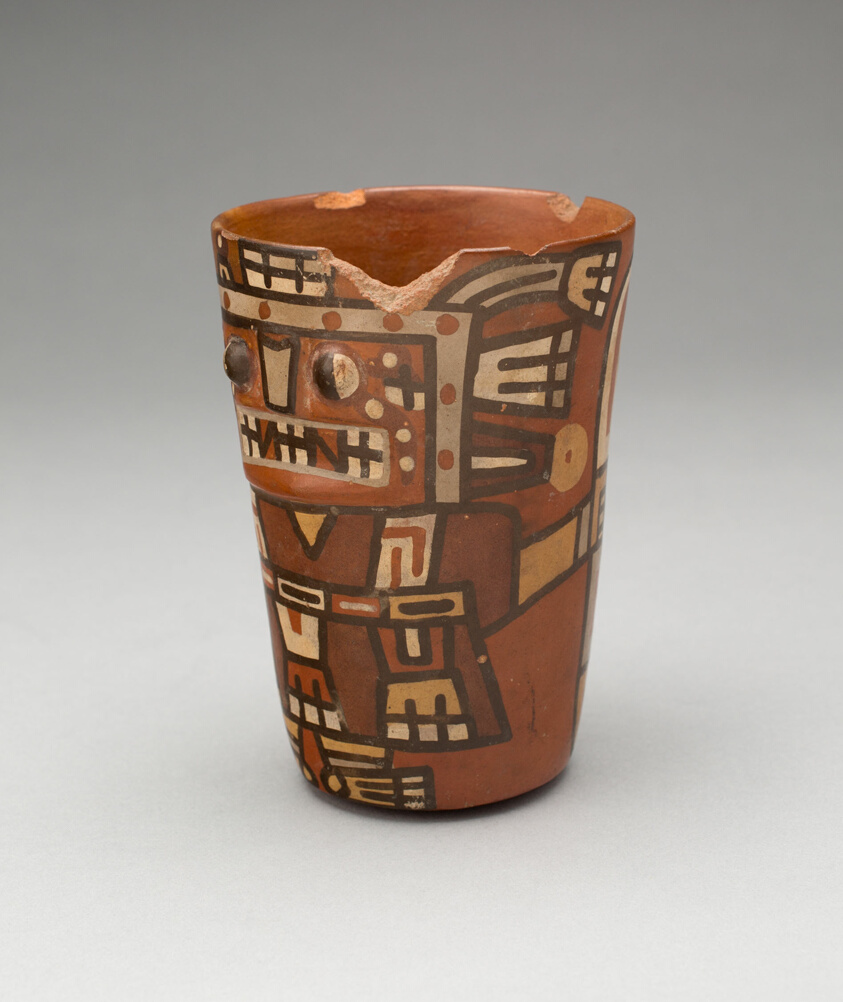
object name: Vessel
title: Drinking Cup (Kero) with an Abstracted Masked Figure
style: tiahuanaco, middle horizon, Pre-Columbian, americas, huari, andes, Arts of the Americas, andean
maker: Tiwanaku-Wari; Bolivia or Peru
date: 600–1000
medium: Ceramic and pigment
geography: Southern Peru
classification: earthenware; ceramics; vessel; art of the americas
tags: abstract figures